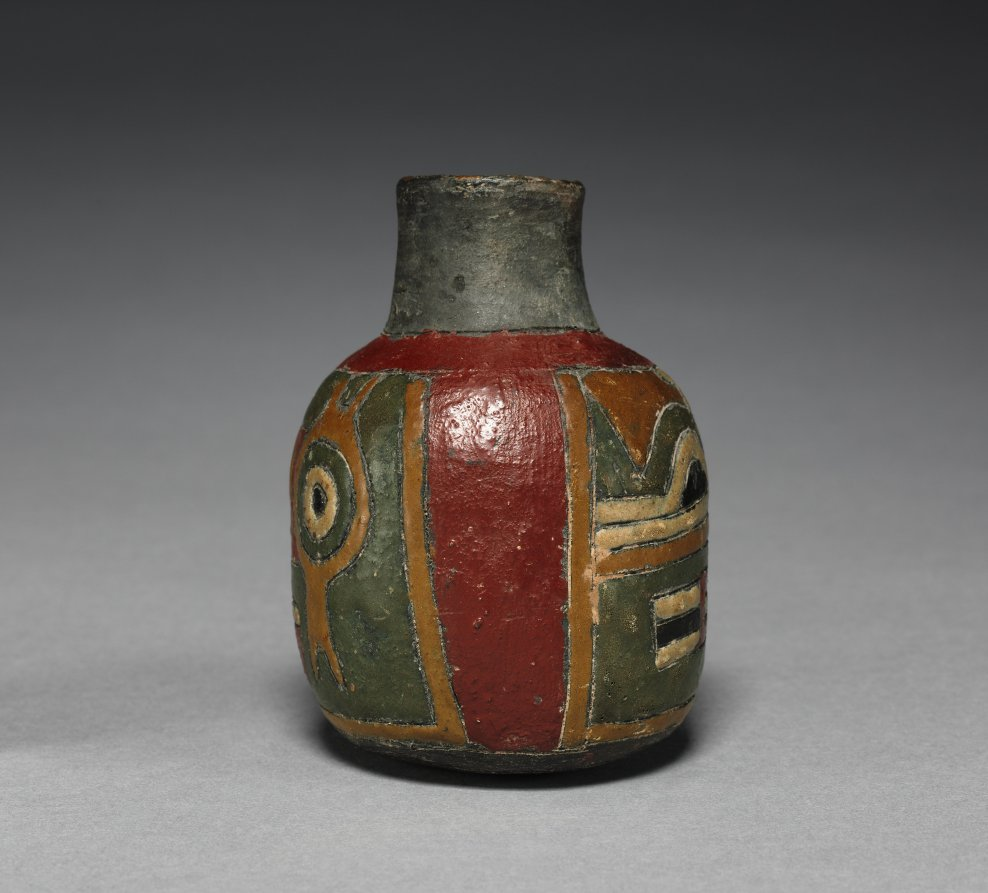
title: Small Bottle with Feline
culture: Peru, South Coast, Paracas (Cavernas) style (700 BCE–1 CE)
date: 700–1 BCE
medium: earthenware, resin-based paint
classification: Ceramic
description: Little is known of the meaning of the beautifully abstracted felines so often incised on Paracas ceramics. The designs achieve much of their complexity through color applied as resin-based paint after the vessel was fired in a smoky atmosphere that blackened its surface.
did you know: Small, wild, reclusive felines, pampas cats live on the margins of agricultural fields, where they prey on rodents and other pests that are a farmer’s bane.